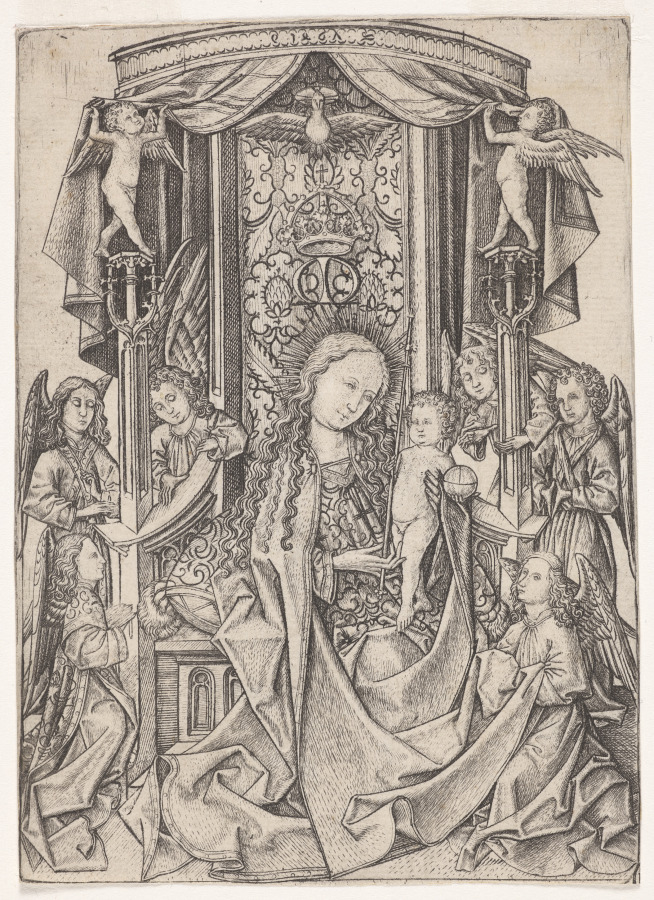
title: Madonna Enthroned with Eight Angels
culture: Germany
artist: Master ES (German, active 1450–67)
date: 1467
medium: engraving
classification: Print